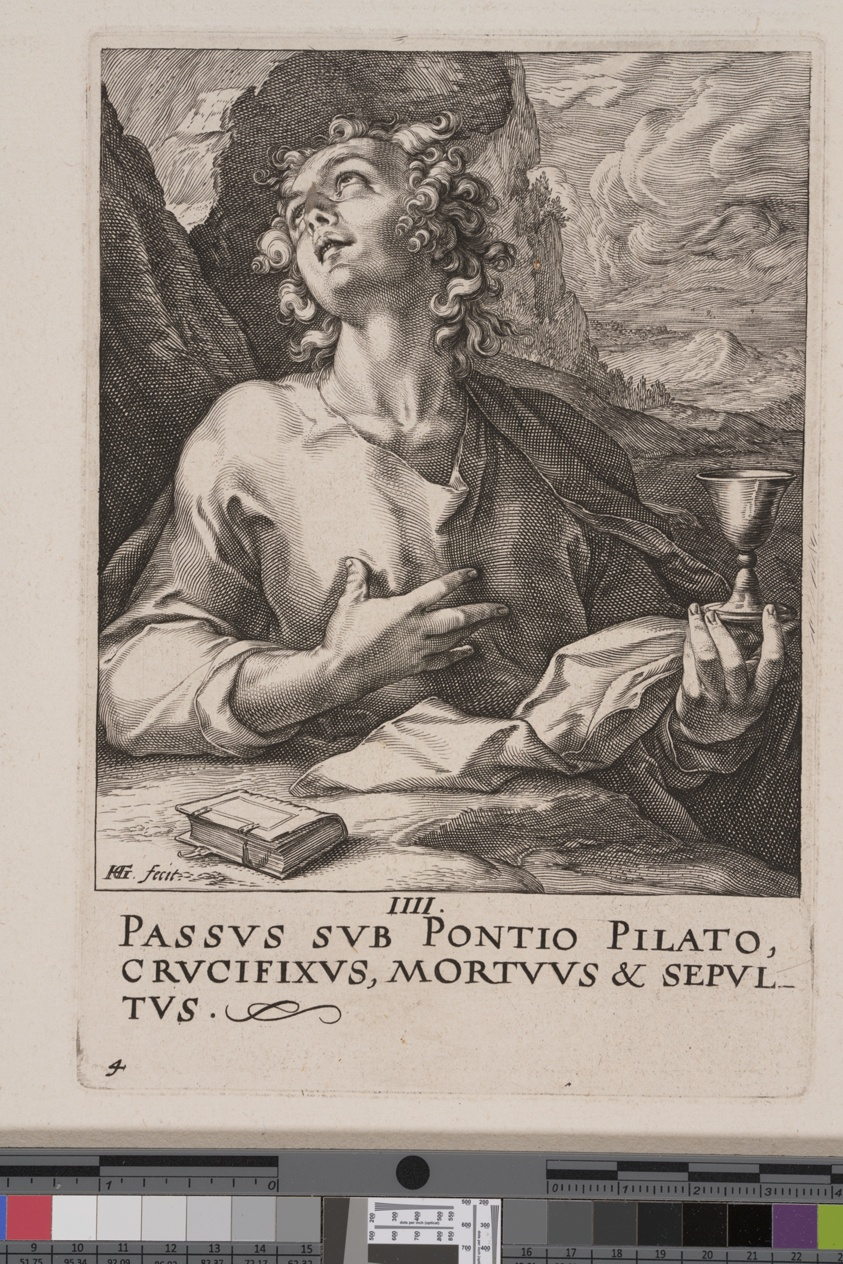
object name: Print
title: St John, from Christ, the Apostles and St Paul with the Creed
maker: Hendrick Goltzius (Dutch, 1558–1617)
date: 1589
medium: Engraving on ivory laid paper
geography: Netherlands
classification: print; paper; prints and drawing; engraving